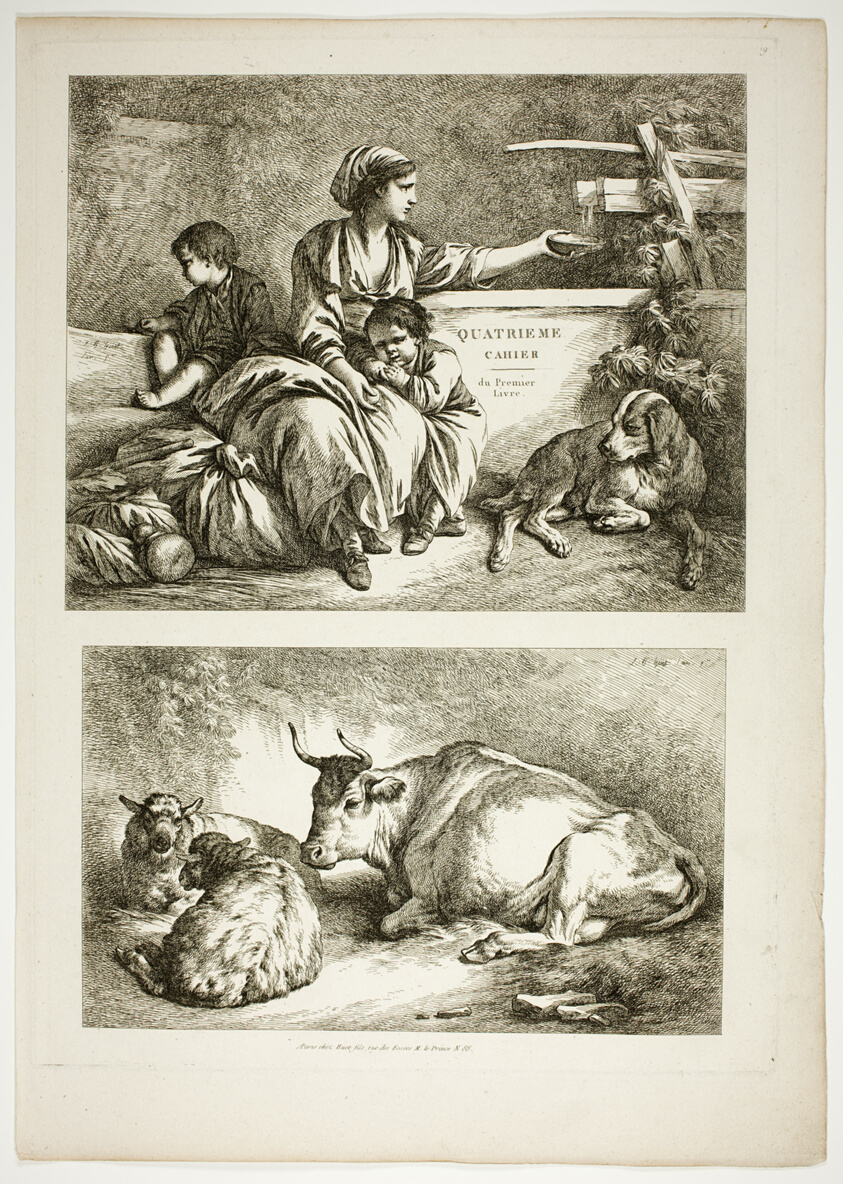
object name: Print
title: Plate Nineteen of 38 from Oeuvres de J. B. Huet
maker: Jean Baptiste Huet (French, 1745-1811)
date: 1796–99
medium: Etching on paper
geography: France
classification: etching; print; prints and drawing